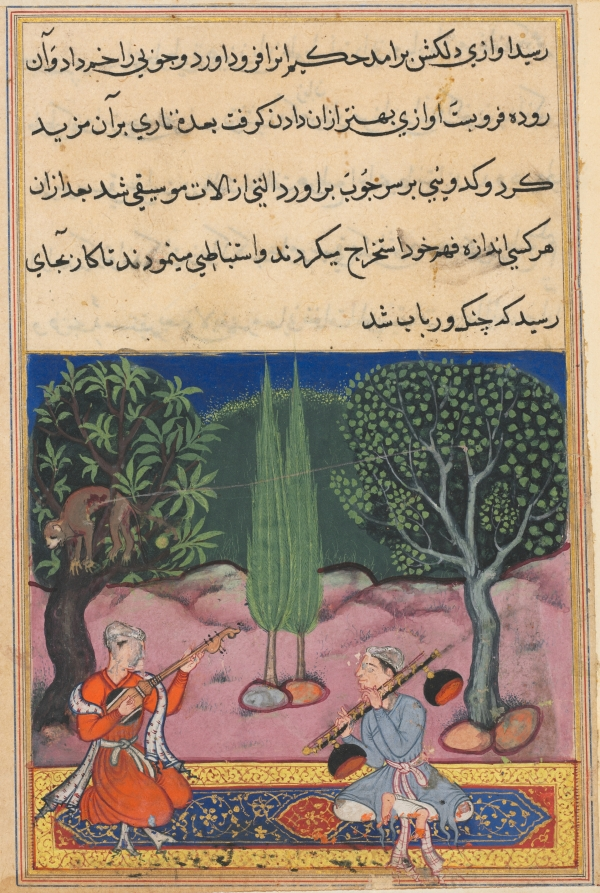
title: The invention of musical instruments from the intestines of a monkey, from a Tuti-nama (Tales of a Parrot): Fourteenth Night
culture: Mughal India, court of Akbar (reigned 1556–1605)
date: c. 1560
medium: gum tempera, ink, and gold on paper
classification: Painting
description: A monkey has been disemboweled while jumping from tree to tree. Once the intestine dried, a wise man attached it to a stick and a gourd, creating the first instrument. Instruments developed from this, called the rebab and the vina, are held by the musicians who sit beneath the trees.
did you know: The rebab-player sits on the left, while the vina-player is on the right.